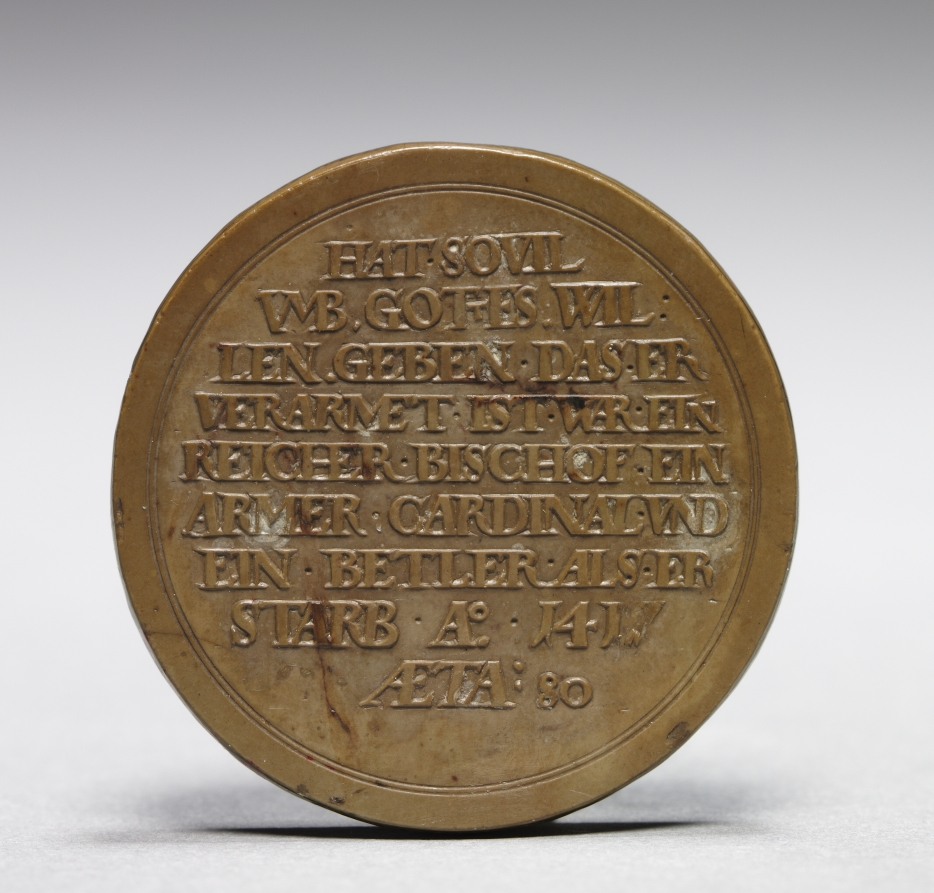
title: Portrait of Antipope Alexander V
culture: Germany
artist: Tobias Wolff (German, 1606)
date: c. 1574–1576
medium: Kelheim stone (fine-grained limestone)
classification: Sculpture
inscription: inscription: ALEX: V. DER 207 BABST REGIRT UNTER KEISER RUPRECHT 10 MON (Alexander V the 207th Pope reigned in the time of Emperor Ruprecht for 10 months.)